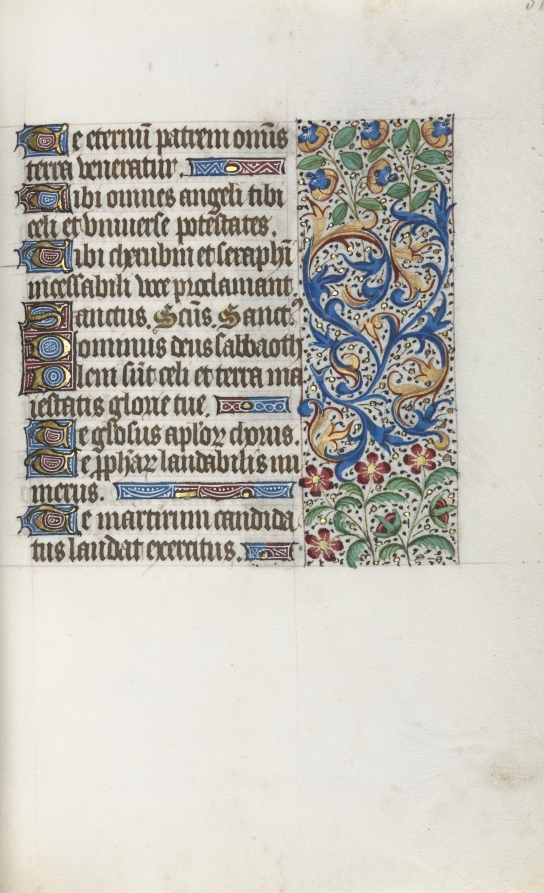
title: Book of Hours (Use of Rouen): fol. 37r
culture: France, Rouen, 15th century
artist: Master of the Geneva Latini (French, active Rouen, 1460–80)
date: c. 1470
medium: ink, tempera, and gold on vellum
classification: Bound Volume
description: In the late 1400s and early 1500s Rouen was an established and important center of book production. The city’s cathedral had a wealthy chapter that spent large sums of money to commission books and to maintain its extensive library. The stationers and booksellers would have likely been concentrated in or near the cathedral precinct. This artist, named after a manuscript now in Geneva, was Rouen’s principal illuminator during the second half of the 1400s.